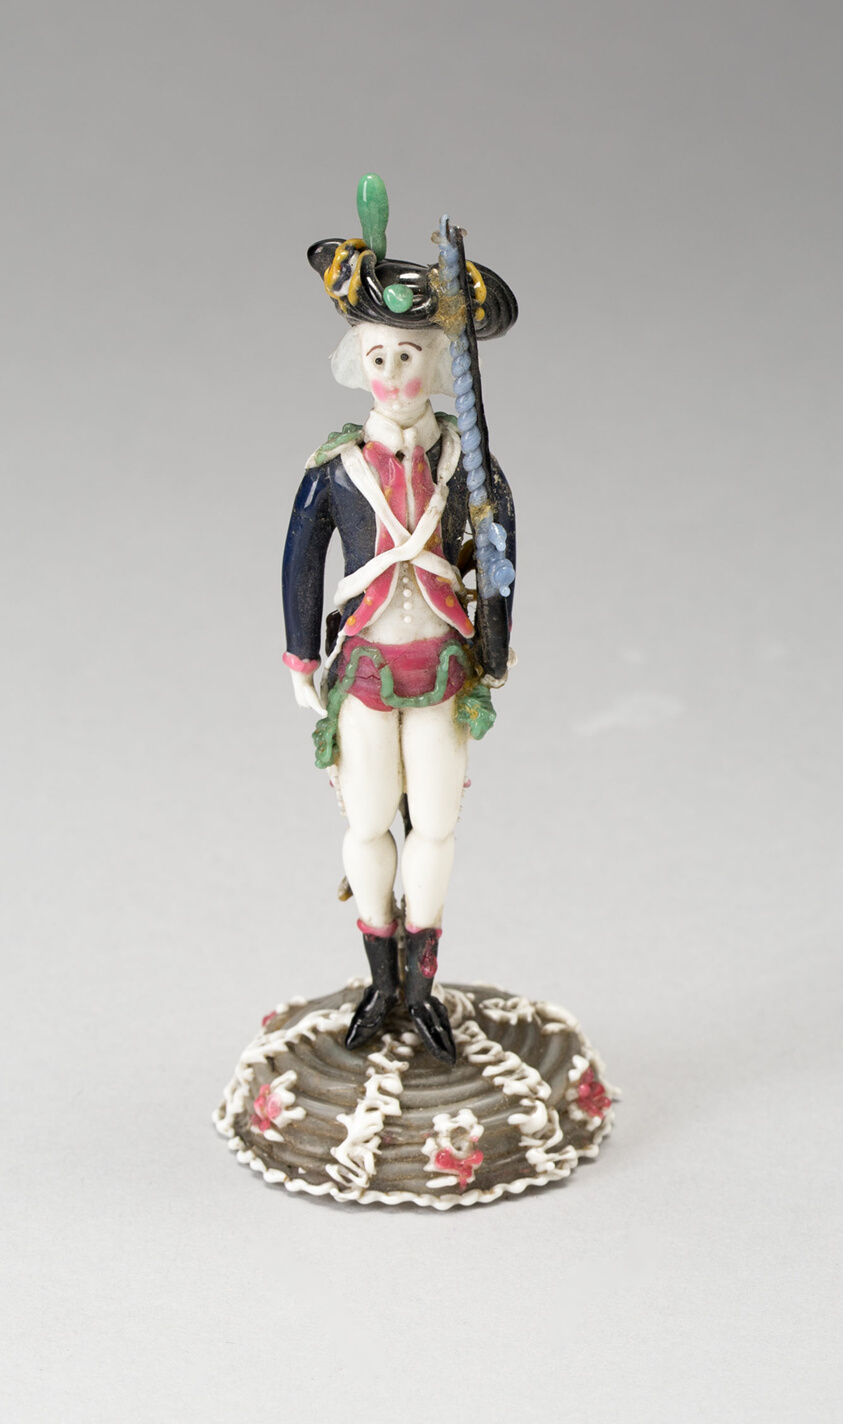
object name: Glass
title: Soldier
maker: Nevers, France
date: 18th century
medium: Glass; lampwork (verre de Nevers), metal armature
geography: France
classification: decorative object/ornament; lampwork; glass; european decorative arts